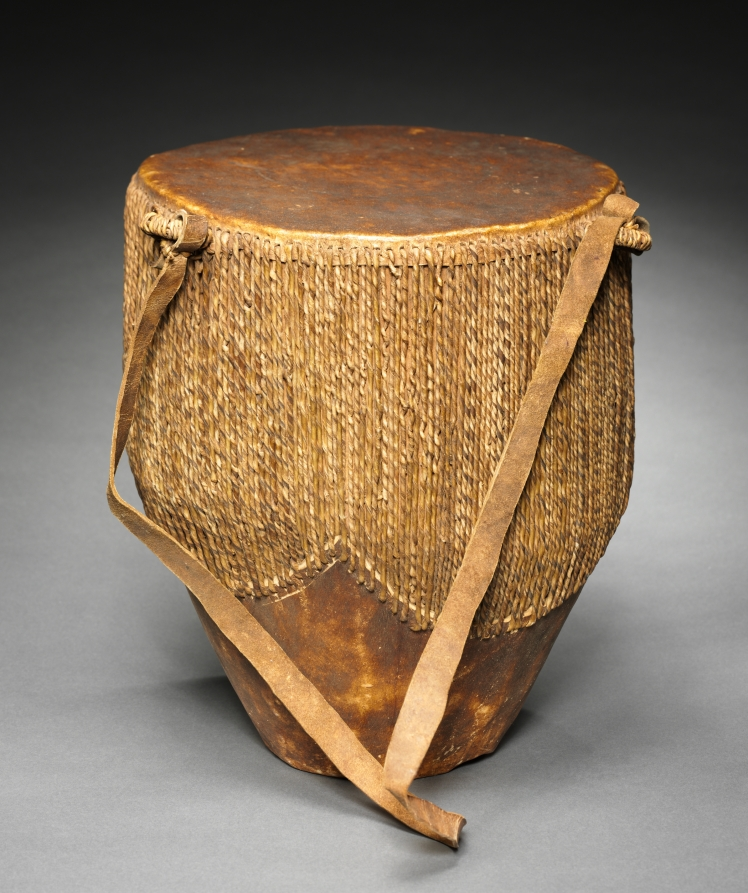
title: Drum (ngoma)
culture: Africa, Eastern Africa, unknown maker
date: by 1928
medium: Wood, rawhide, and plant fiber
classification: Musical Instrument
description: This musical instrument takes its name ngoma from the Kongo language word for "drum." Specialized craftspeople often made these drums. The wooden base is hollow and covered with a first hide, then a second one held tight by plant fibers. This allows the sound to resonate when just the first membrane is struck. In Uganda, drums contain a ritual "heart" known only to its maker, which helps to imbue it with power. In contrast with royal drums (mpango), this instrument is not considered sacred. The sounds from men striking drums could be used as a kind of communication or as music in a performance setting.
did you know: Paul Travis purchased this piece in Kampala, Uganda, shortly after receiving a telegram informing him that the African Art Sponsors and the Gilpin Players had commissioned him to collect African works with money they raised.